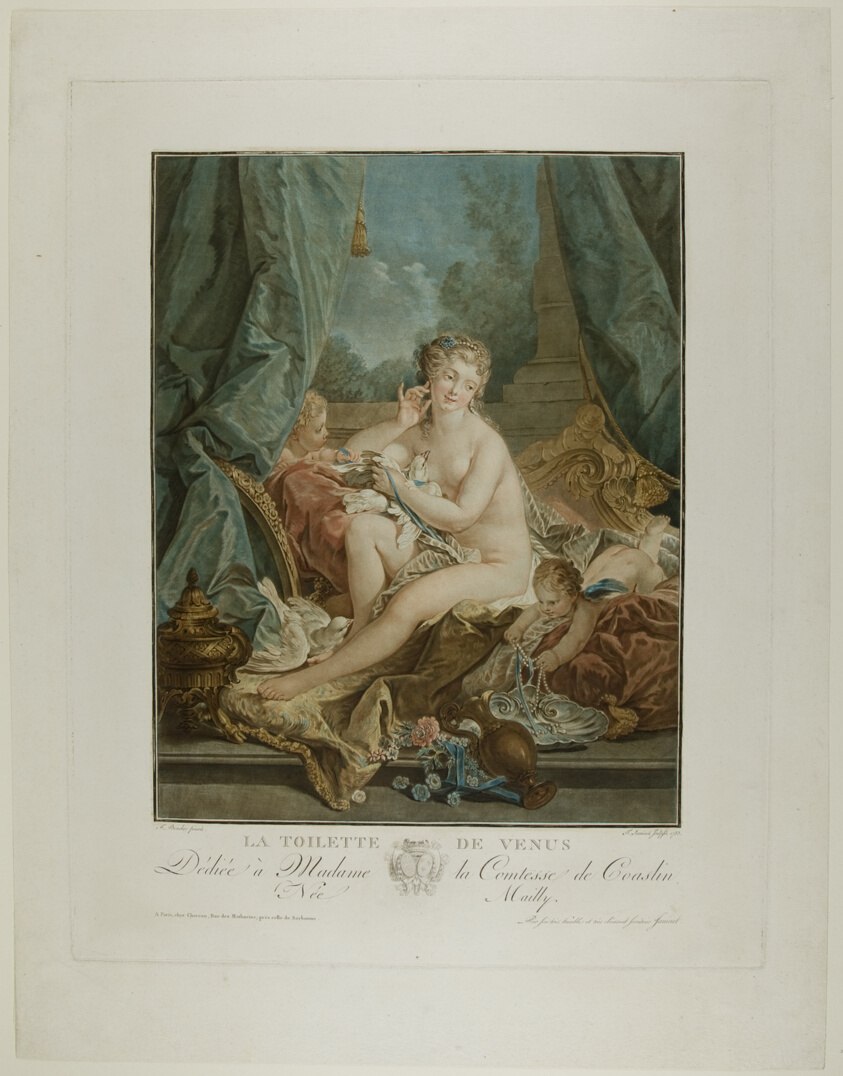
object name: Print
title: La Toilette de Venus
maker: Jean-François Janinet (French, 1752-1814); after François Boucher (French, 1703-1770)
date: 1783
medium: Color aquatint from four plates, crayon-manner, and etching on paper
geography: France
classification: etching; print; prints and drawing